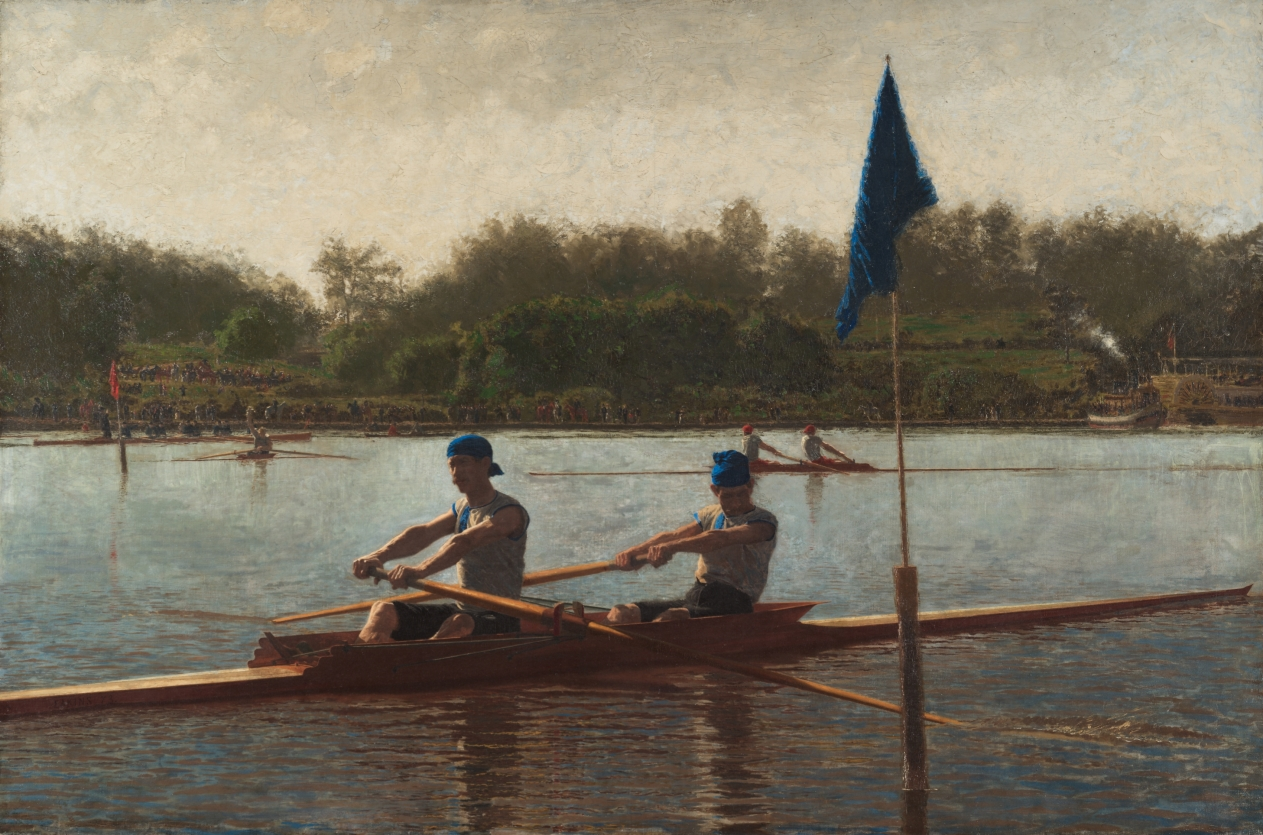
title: The Biglin Brothers Turning the Stake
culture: America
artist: Thomas Eakins (American, 1844–1916)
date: 1873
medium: oil on canvas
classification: Painting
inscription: signed lower left: EAKINS 73.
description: Eakins's painting celebrates athletic teamwork while commemorating an actual event, a famous rowing race that took place on the Schuylkill River in Philadelphia during May 1872. Throngs of spectators line the riverbank and watch as Barney and John Biglin negotiate the tricky turn around a stake marking the halfway point in the contest. Their competitors, seen in the middle distance at the right, lag behind. The Biglin brothers won the race, cementing their status as the most celebrated oarsmen of the era. Trained in the United States and France, Eakins spent almost his entire artistic career in his hometown of Philadelphia. He is renowned for the unsentimental realism in his paintings, whose compositions he developed through painstakingly prepared figure and perspective drawings.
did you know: Rowing was among the most popular spectator sports in the U.S. during the 1870s.